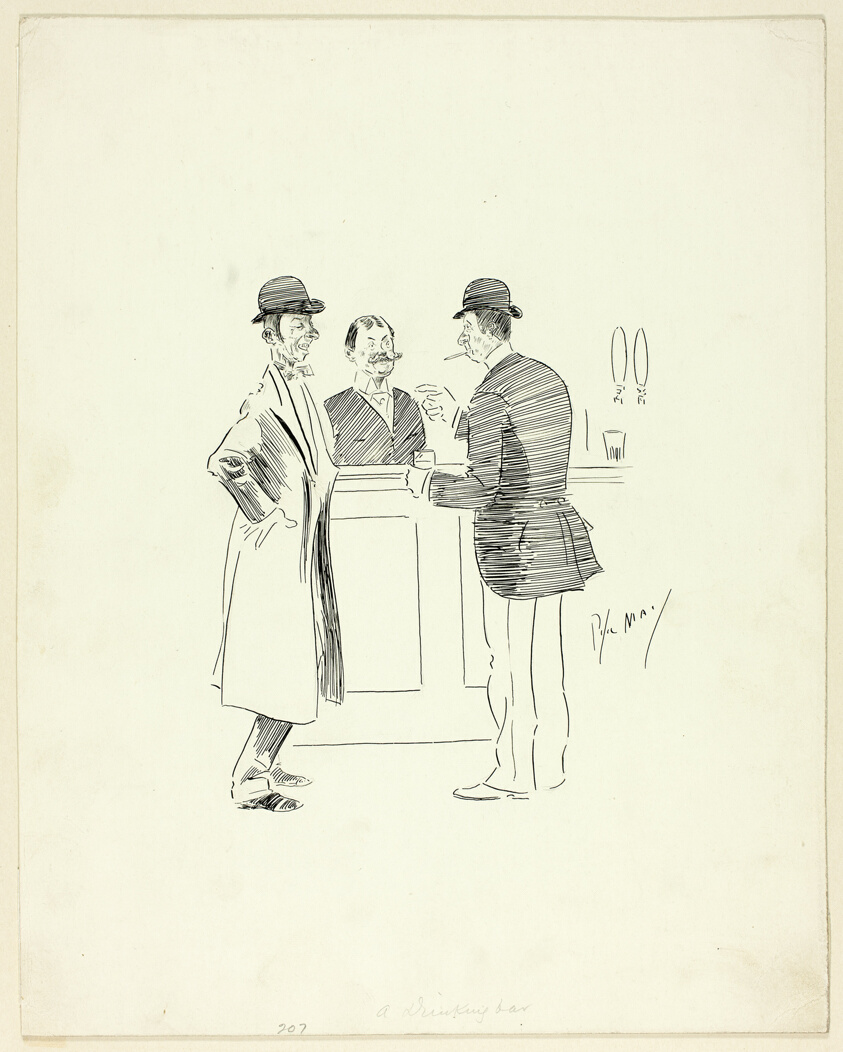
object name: Drawing and Watercolor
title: A Drinking Bar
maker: Philipp William May; English, 1864-1903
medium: Pen and black ink over traces of graphite on ivory wove card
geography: England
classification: pen and ink drawings; drawings (visual works); prints and drawing